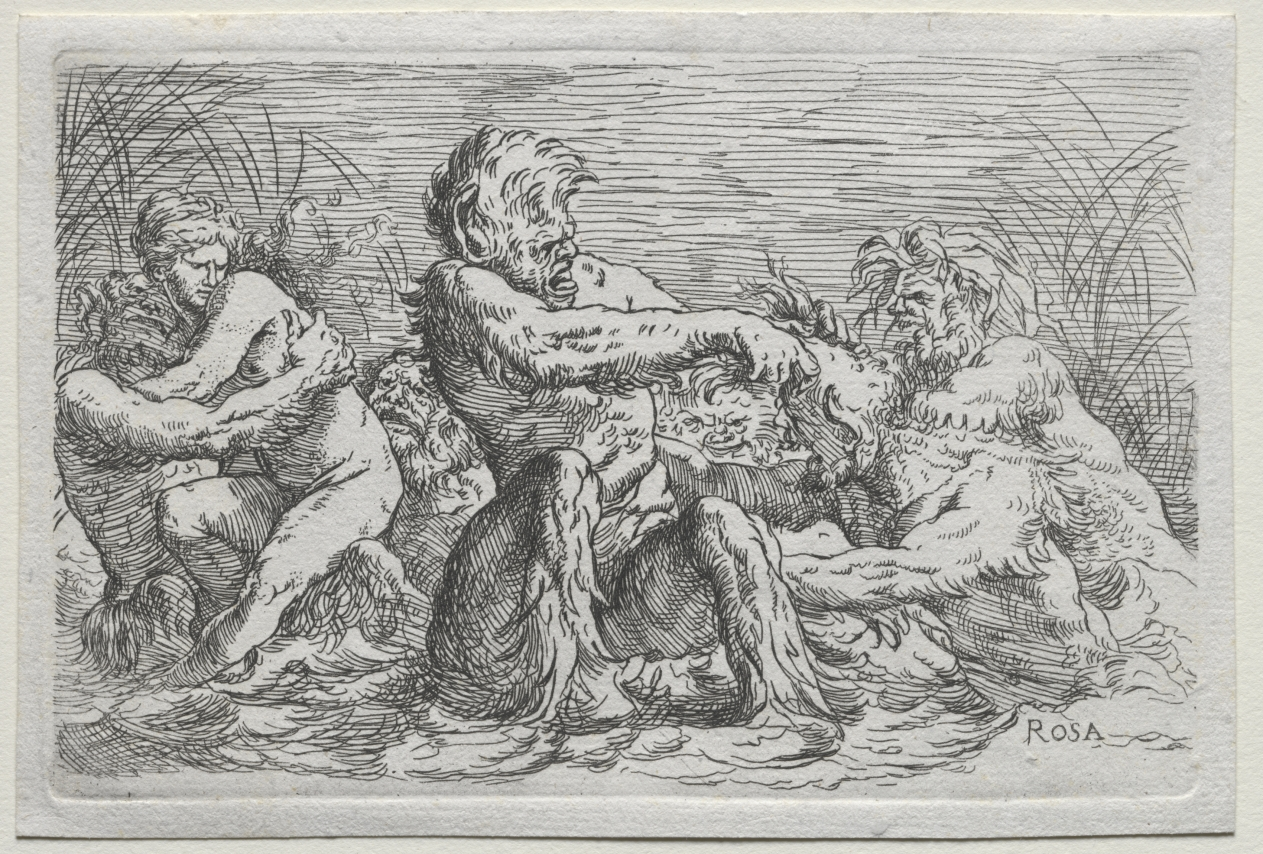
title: River Gods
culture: Italy, 17th century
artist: copy after Salvator Rosa (Italian, 1615–1673)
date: c. 1660s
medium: etching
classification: Print